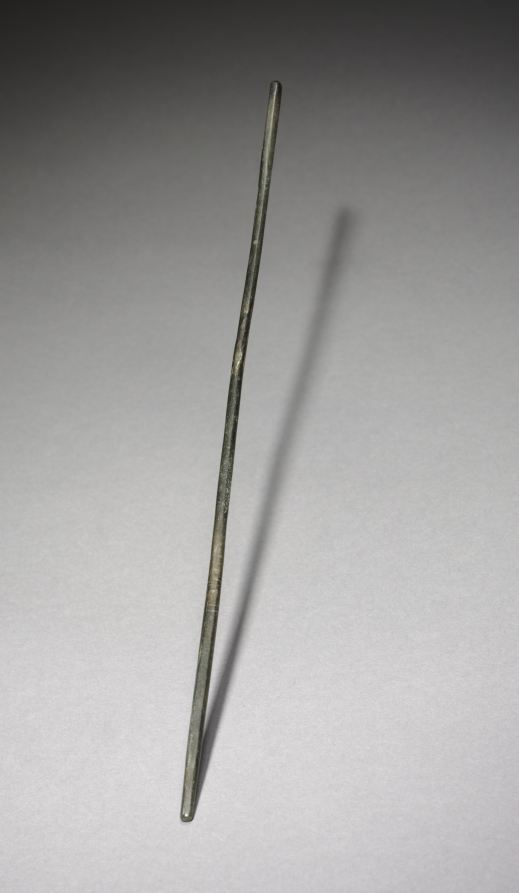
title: Chopstick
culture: Korea, Goryeo dynasty (918–1392)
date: 918–1392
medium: bronze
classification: Metalwork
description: In Korea, chopsticks made of metal such as brass, silver, and gold were excavated from ancient tombs and ruins dated to the 6th century at the earliest. Burial goods often include utilitarian objects such as table wares and utensils because the dead were believed to need them in the afterlife.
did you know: In contrast to the Chinese and Japanese, Koreans still prefer metal chopsticks (stainless steel and brass) to wooden ones.